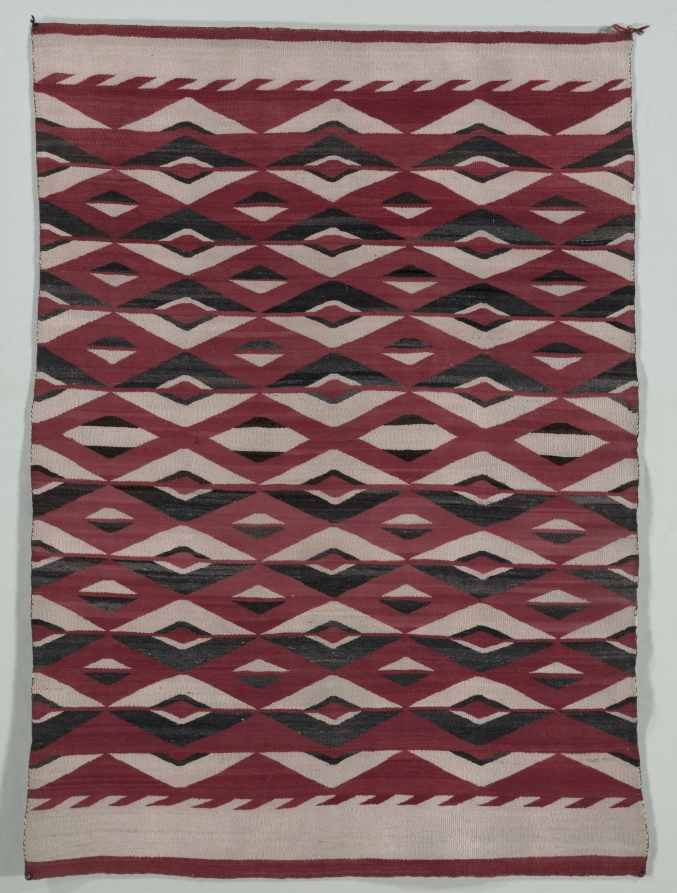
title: Diamond Network Style Rug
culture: America, Native North American, Southwest, Navajo, Post-Contact, Transitional Period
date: c. 1890–1900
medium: tapestry weave: wool (handspun)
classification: Textile